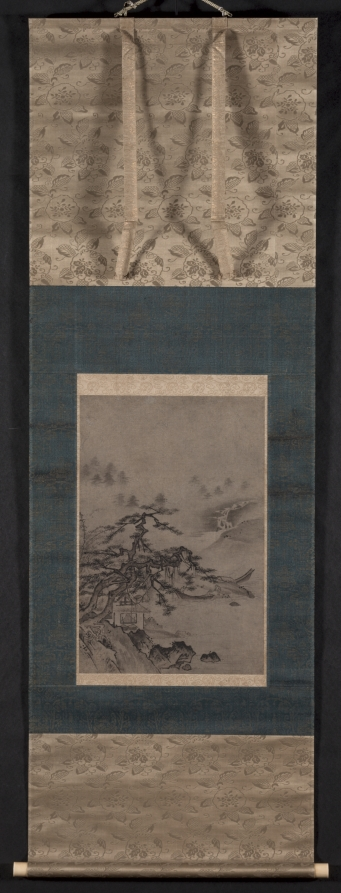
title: Thatched Hut by Water's Edge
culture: Japan, Muromachi period (1392–1573)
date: c. 1500–1573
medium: hanging scroll; ink on paper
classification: Painting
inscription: seal: 龍杏 ?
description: Muromachi period (1392–1573) artists in Japan were keenly interested in Korean and Chinese culture. Paintings from the continent were avidly collected, studied, and copied for specific techniques and effects. Most painters, however, never had the opportunity to actually travel abroad. This painting presents a typical, idealized image of a Chinese scholar's retreat in the countryside. The misty background, however, brings a decidedly Japanese element to the composition. Japanese painters had long been interested in portraying the seasons and in suggesting the special atmosphere of a place.